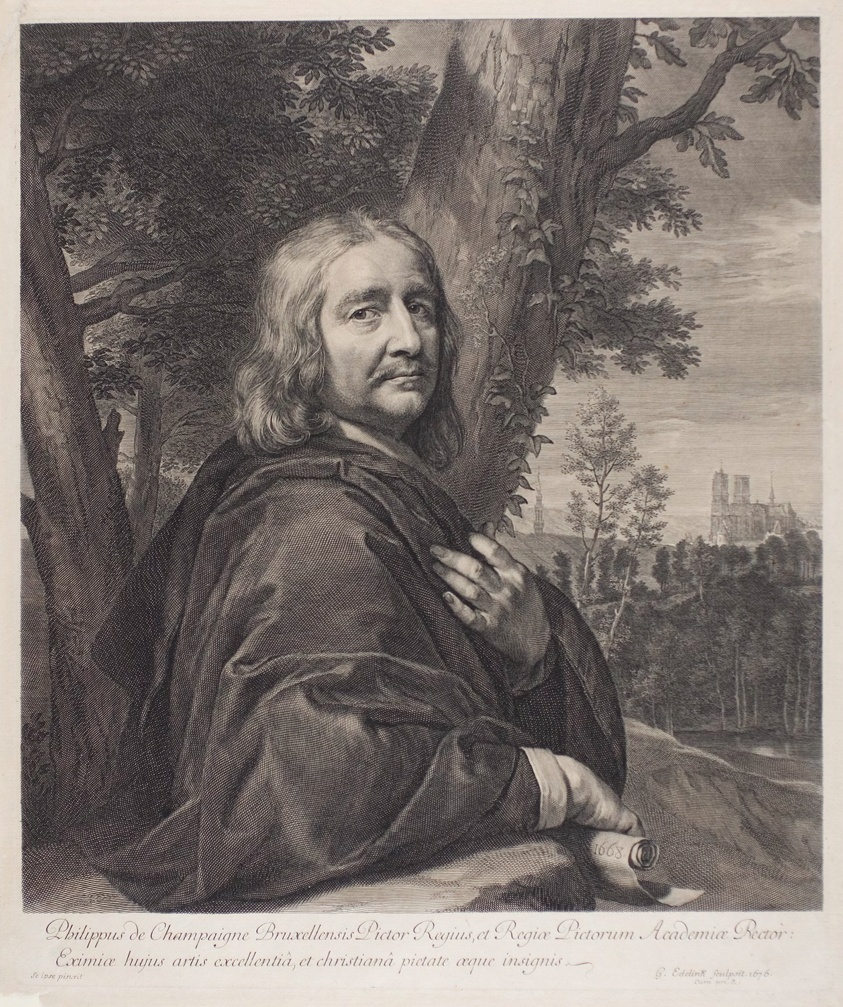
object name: Print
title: Philippe de Champaigne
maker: Gérard Edelinck (French, born Flanders, 1640-1707); after Philippe de Champaigne (French, 1602-1674)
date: 1676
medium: Engraving on paper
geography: France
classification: engraving; print; prints and drawing